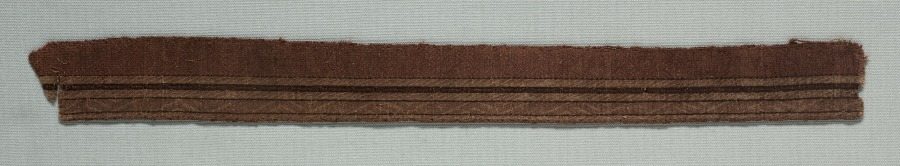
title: Two Fragments of a Band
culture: Italy, Sicily, end of 11th century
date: late 1000s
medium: tablet weave; silk and gold metal thread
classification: Textile